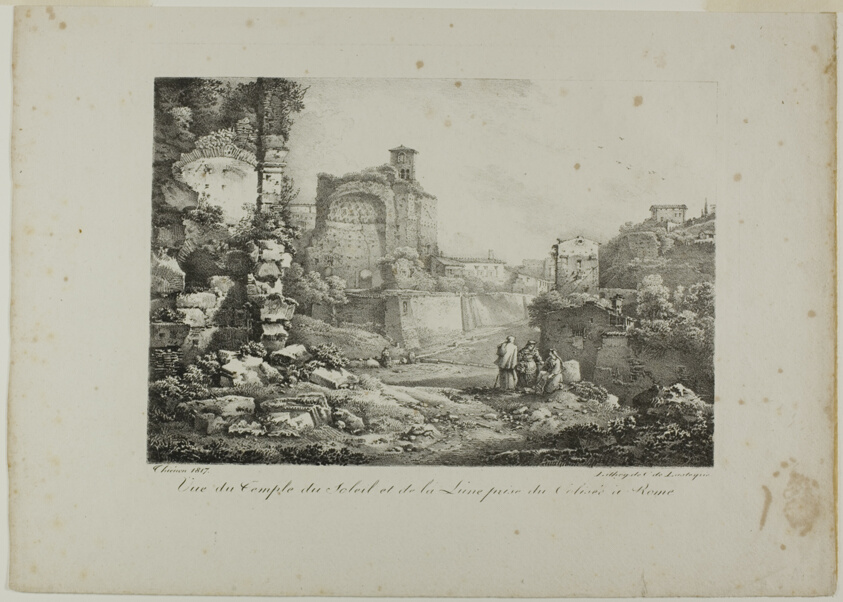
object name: Print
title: View of the Temple of the Sun and Moon from the Coliseum in Rome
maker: Claude Thienon (French, 1772-1846); printed by Comte de Charles Philibert Lasteyrie du Saillant (French, 1759-1849)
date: 1817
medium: Lithograph in black on ivory wove paper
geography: France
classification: lithograph; print; prints and drawing